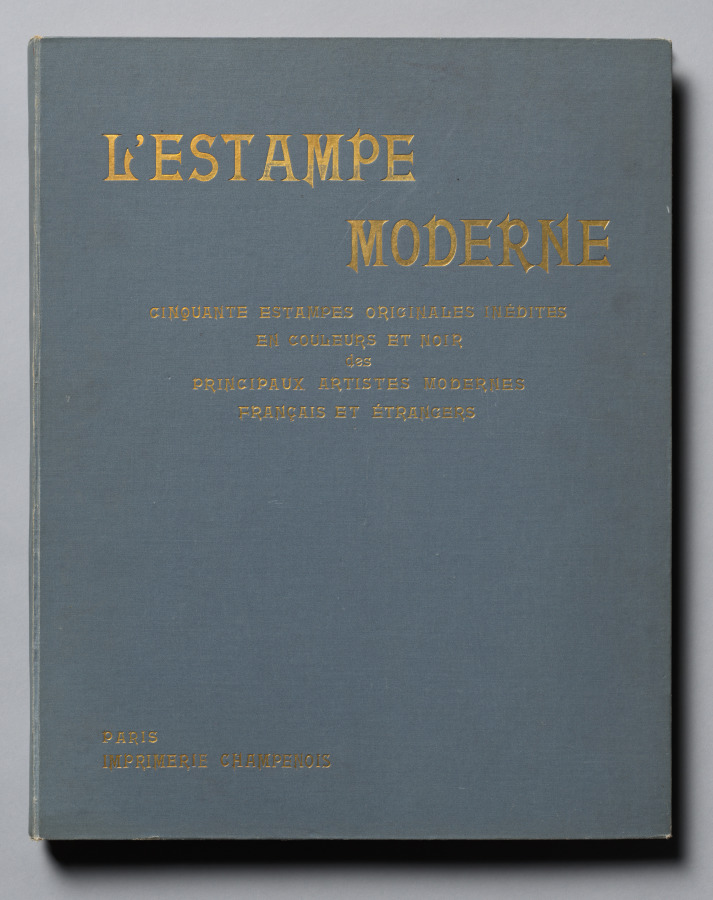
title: L'Estampe Moderne: Cinquantes Estampes Originales Inédites en Couleur et Noir des Principaux Artistes Modernes Français et Étrangers, Vol. II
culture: France, 19th century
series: L'Estampe Moderne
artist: Adolphe Giraldon (French, 1855–1933)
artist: Adolphe Léon Willette (French, 1857–1926)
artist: Alfred-Pierre Agache (French, 1843–1915)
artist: Alfredo Müller (Italian, 1869–1940)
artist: Angelo Jank (German, 1868–1940)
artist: Auguste Roedel (French, 1859–1900)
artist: Charles Huard (French, 1874–1965)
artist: Charles Paul Renouard (French, 1845–1924)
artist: Charles-François-Prosper Guérin (French, 1875–1939)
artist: Edward Burne-Jones (British, 1833–1898)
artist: Étienne Dinet (French, 1861–1929)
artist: Eugène Delâtre (French, 1864–1938)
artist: Eugène Grasset (French, 1841–1917)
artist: Eugène Trigoulet (French, 1867–1910)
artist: Félix Bracquemond (French, 1833–1914)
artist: Ferdinand Jean Luigini (French, 1870–1943)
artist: Fernand Cormon (French, 1845–1924)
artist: Fernand Piet (French, 1869–1942)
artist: Firmin Bouisset (French, 1859–1925)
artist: Francis Jourdain (French, 1876–1958)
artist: François Guiguet (French, 1860–1937)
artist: Gaston Bussiere (French, 1862–1929)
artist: Guillaume Dubufe (French, 1853–1909)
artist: Henri Bellery-Desfontaines (French, 1867–1910)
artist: Henri Fantin-Latour (French, 1836–1904)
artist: Henri Le Sidaner (French, 1862–1939)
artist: Henri Gabriel Ibels (French, 1867–1936)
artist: Henri Jean Guillaume Martin (French, 1860–1943)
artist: Henri Patrice Dillon (American, 1851–1909)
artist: Henri-Jules Guinier (French, 1867–1927)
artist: Jacques Baseilhac (French, 1874–1903)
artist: Jeanne Granès (French, 1887–1917)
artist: Jules Gustave Besson (French, b. 1868)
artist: Jules Léon Flandrin (French, 1871–1947)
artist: Jules-Alexis Muenier (French, 1863–1942)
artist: Louis Bourgeois Borgex (French, 1873–1959)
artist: Louis Joseph Raphaël Collin (French, 1830–1916)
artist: Louis Welden Hawkins (French, 1849–1910)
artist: Louise Breslau (Swiss, 1856–1927)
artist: Luc-Olivier Merson (French, 1846–1920)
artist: Lucien-Hector Monod (French, 1867–1957)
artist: Manuel Robbe (French, 1872–1936)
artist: Marguerite Delorme (French, 1876–1946)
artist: Maurice Desvallières (French, 1857–1926)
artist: Maximilienne Guyon (French, 1869–1903)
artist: Paul Alexandre Alfred Leroy (French, 1860–1942)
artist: Paul César Helleu (French, 1859–1927)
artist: Raoul André Ulmann (French, 1867–1932)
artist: Théophile Alexandre Steinlen (Swiss, 1859–1923)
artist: Victor Emile Prouvé (French, 1858–1943)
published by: Imprimerie Champenois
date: May1898-April 1899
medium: Bound volume containing 50 lithographs, each with a tissue paper guard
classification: Bound Volume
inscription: inside front cover, lower margin, in graphite: JB 464; inside front cover, lower right, in graphite: unit 50 lito tef. / AM889/II/12To / 150,000, -; inside back cover, lower left corner, adhesive sticker with barcode and text around an image of a bridge and an a combined "A" and "T": ANTIKVARIAT "U KARLOVA MOSTU" / KARLOVA 2, PRAHA 1